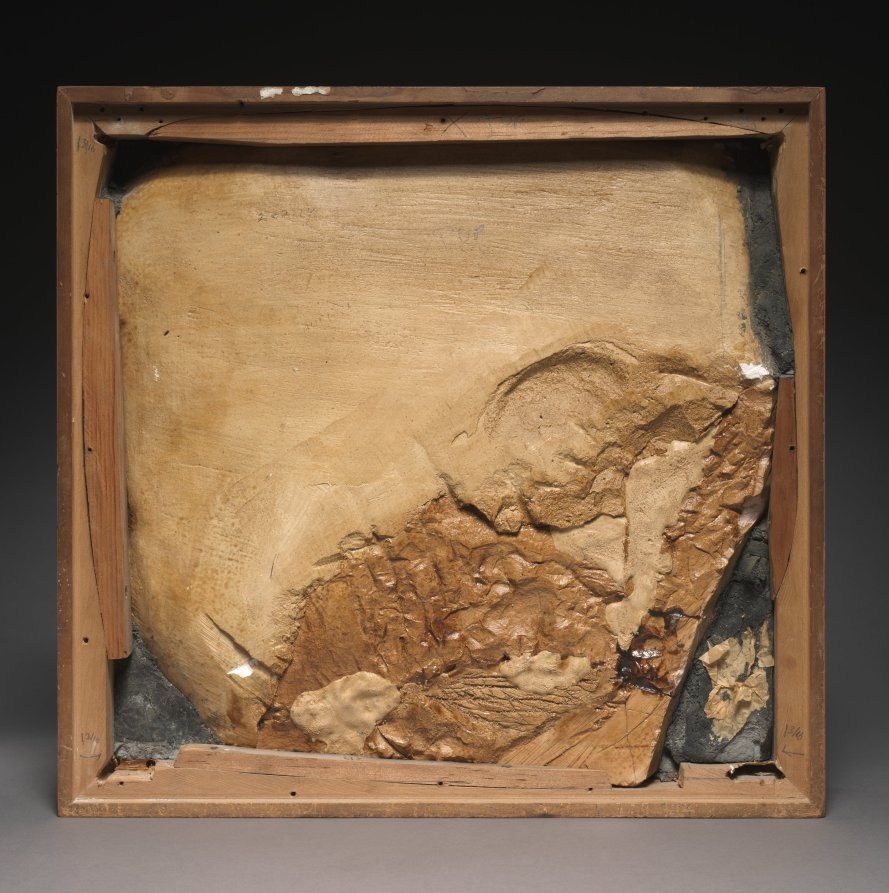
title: Fragment of a Tomb Relief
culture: Egypt, probably Thebes, New Kingdom (1540–1069 BCE), Dynasty 18, reign of Tuthmosis II (1493–1479 BCE) or later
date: 1401–1391 BCE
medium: limestone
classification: Sculpture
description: In later ages tombs must have served as dwelling places for peasants, since the walls became completely blackened with soot. This fragment is from the most common type of Egyptian tomb scene: the deceased and his wife seated at the funeral banquet of at an offering table.